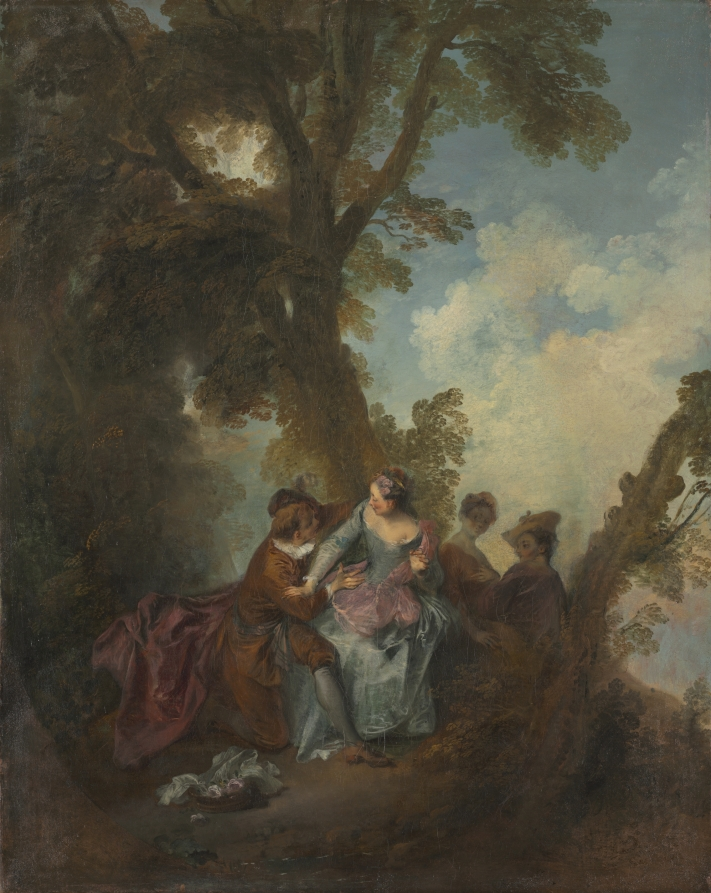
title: Declaration of Love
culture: France, 18th century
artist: Nicolas Lancret (French, 1690–1743)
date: c. 1720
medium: oil on canvas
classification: Painting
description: A category of painting invented in France in the early 1700s is the fête galante (gallant party), with subject matter that hovers between fantasy and reality. The figures in theatrical costume derive from Italian street performers seen in Paris, while the playful outdoor garden party connects to leisure activities enjoyed by certain Parisian elites. The arts of conversation, music, and painting—all highly valued by French aristocracy—intersect in this work.